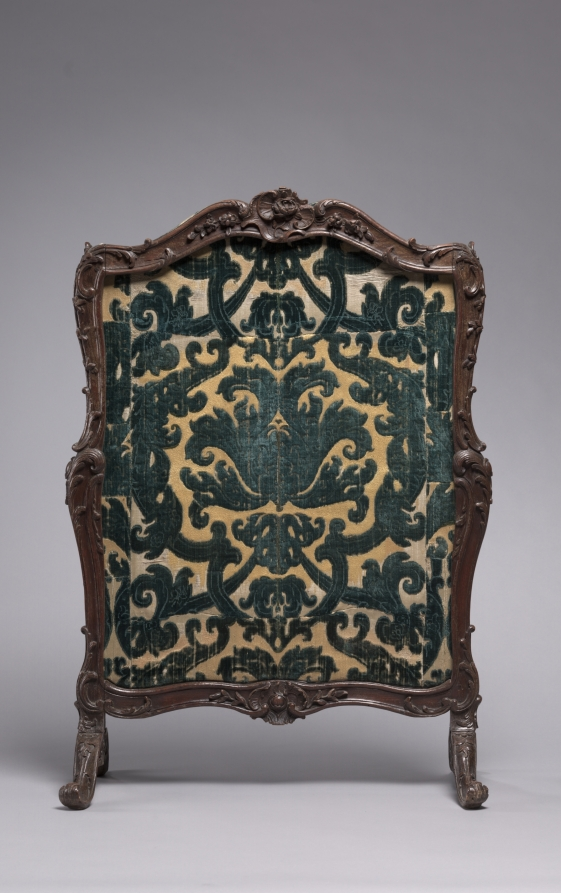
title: Fire Screen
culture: France, 18th century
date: c. 1750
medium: wood and velvet panel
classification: Furniture and woodwork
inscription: inscribed beneath in three places: 32.